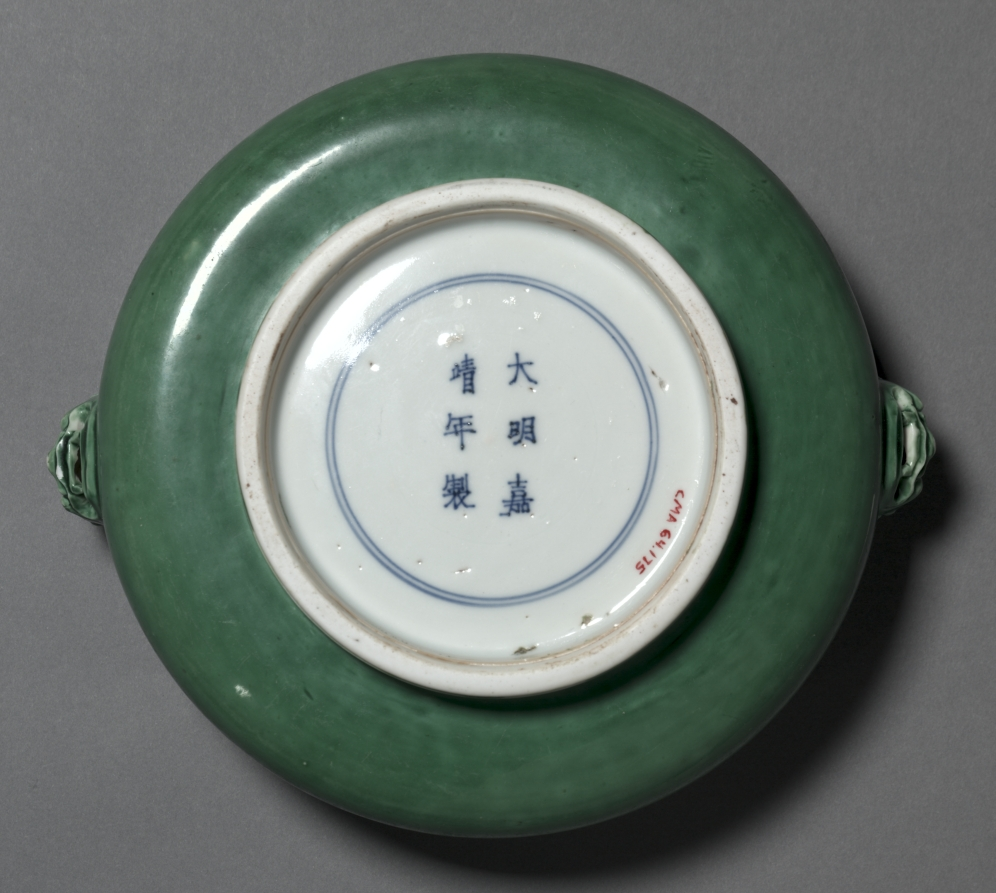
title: Bowl in Form of Archaic Gui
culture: China, Jiangxi province, Jingdezhen, Ming dynasty (1368-1644), Chongzhen reign (1628-44) or Qing dynasty, Shunzhi reign (1644-61), but Ming dynasty (1368-1644), Jiajing mark (1522-66)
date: 1628–61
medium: porcelain with camellia-leaf green glaze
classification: Ceramic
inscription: 大明嘉靖年製